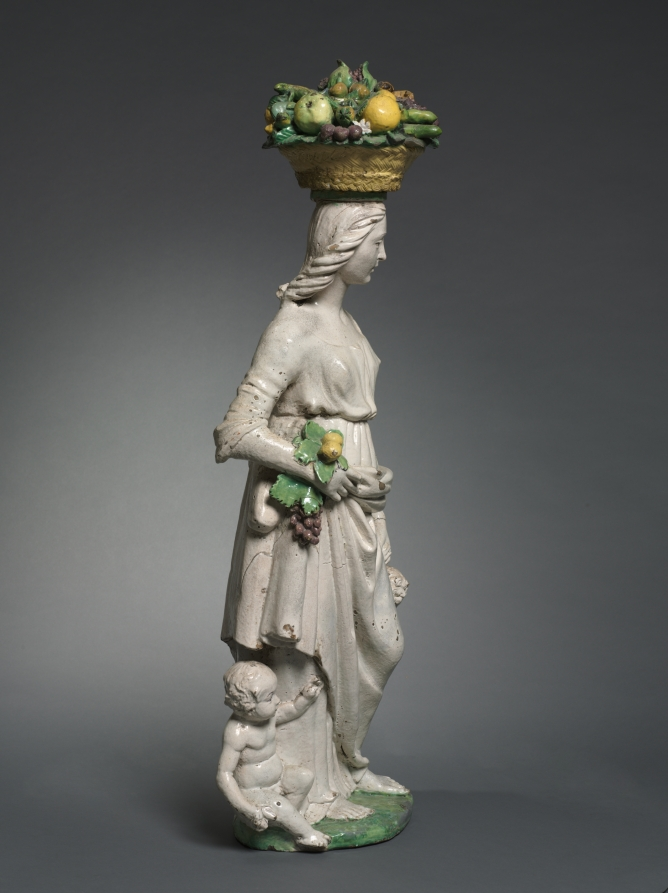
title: Dovizia (Plenty)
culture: Italy, Florence, 16th century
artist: Giovanni della Robbia (Italian, 1469–1529/30)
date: c. 1520–29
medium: glazed terracotta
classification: Sculpture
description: Many elite Florentine Renaissance homes had sculptures of idealized young women carrying nature’s bounty, such as this work. The motif stems from a statue by Donatello (about 1386–1466) that towered over Florence’s main public market. At home, however, the sculpture became a talisman for the family’s well-being. The city-state’s low birth rate was a serious political matter, and such a sculpture was believed to stimulate fertility while also promoting motherhood and bolstering financial success.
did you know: Inspired by an over life-sized, public sculpture by Donatello, Giovanni della Robbia reduced the figure for a domestic setting.